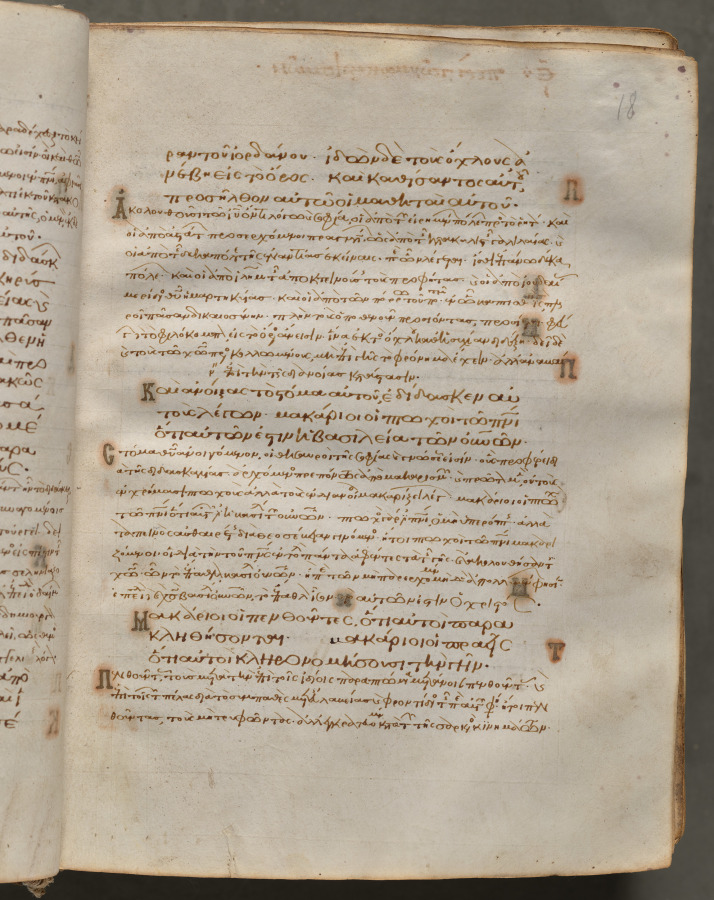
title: Text, folio 18 (recto), from a Gospel Book with Commentaries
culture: Byzantium, Constantinople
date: c. 1000–1100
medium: ink, tempera, and gold on vellum; leather binding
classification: Bound Volume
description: Each of the four gospels in this book opens on a page with brilliantly illuminated borders depicting the author of the text as well as birds-principally peacocks, symbols of the immortality of the soul-and fountains, representing the fountain of life and the salvation of the soul. This volume consists of 428 leaves with texts in Greek. Its level of sophistication suggests that it was probably written and decorated in a monastery in Constantinople.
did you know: Gospel Books were carried in procession through Byzantine churches.